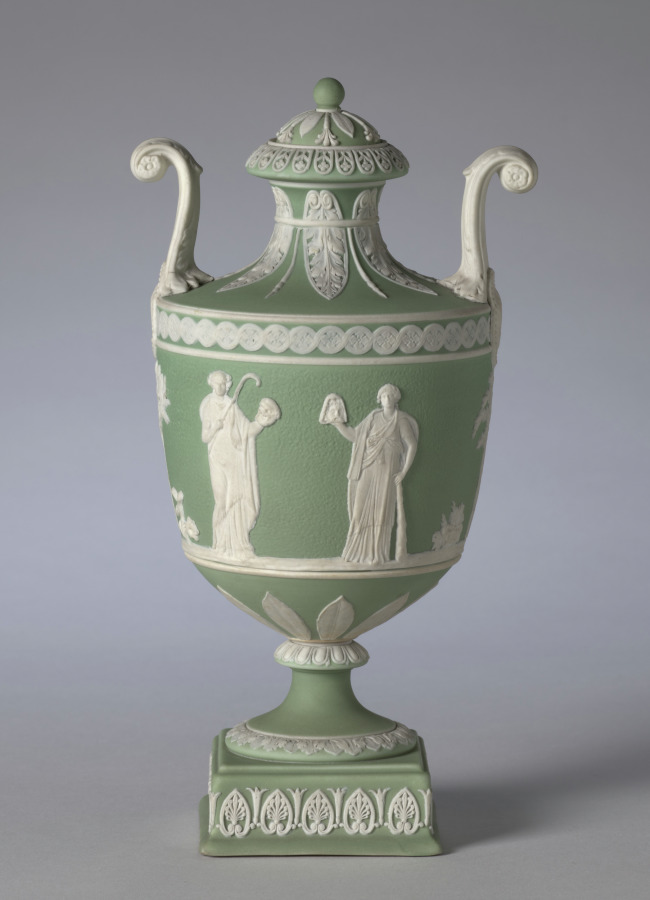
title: Covered Urn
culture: England, Staffordshire, late 18th-early 19th Century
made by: Wedgwood Factory (British)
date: c. 1800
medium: jasper ware with relief decoration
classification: Ceramic